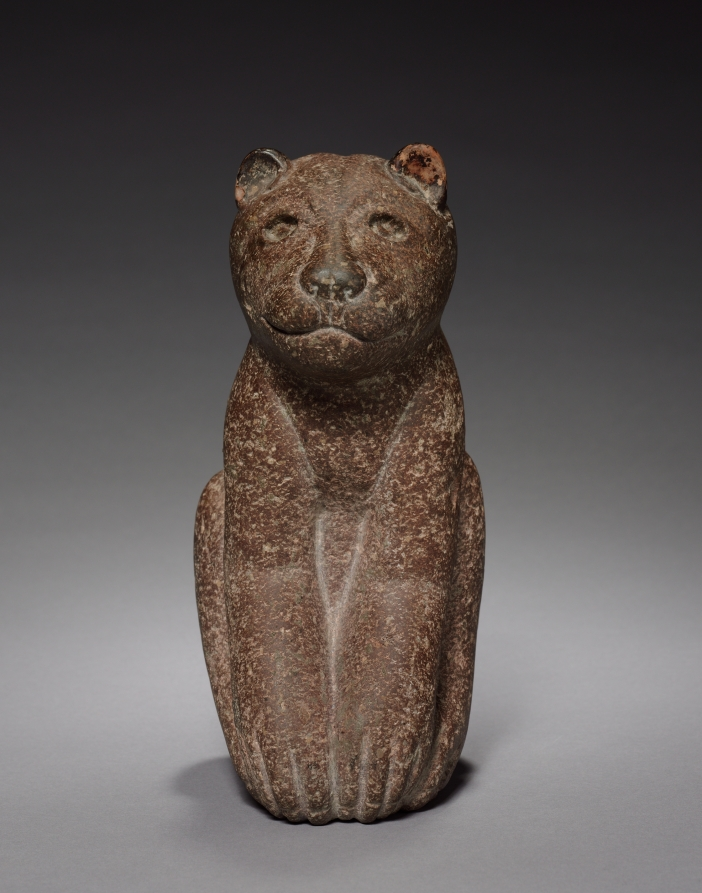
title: Feline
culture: Central Mexico, Aztec, 13th-16th century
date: c. 1200–1519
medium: stone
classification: Sculpture